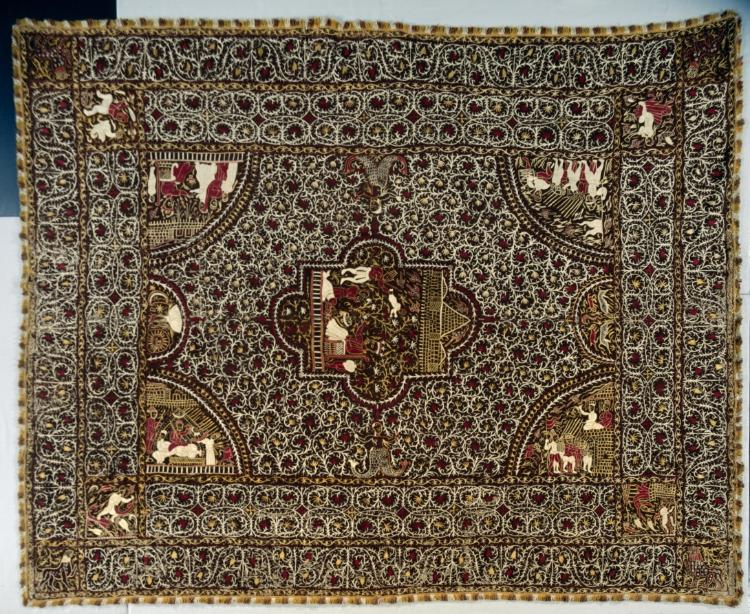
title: Bedspread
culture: India, Goa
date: 1600s–1700s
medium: Silk on cotton; embroidery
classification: Embroidery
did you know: The design features biblical scenes with Indian mythological characters and Portuguese-costumed figures embroidered in chain stitch.